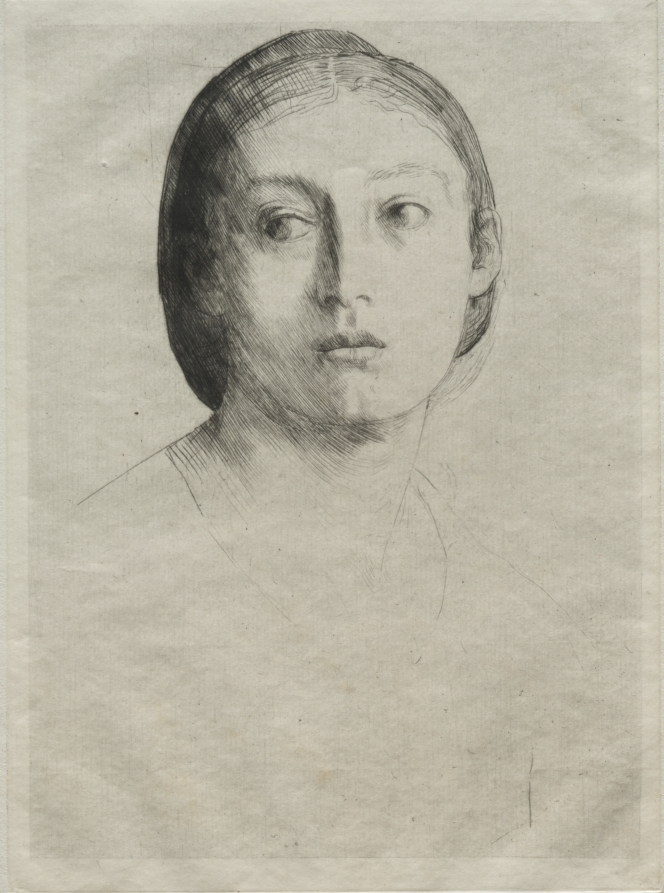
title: Head of a Young Girl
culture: France, 19th-20th century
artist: Alphonse Legros (French, 1837–1911)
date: 1875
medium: etching and drypoint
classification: Print